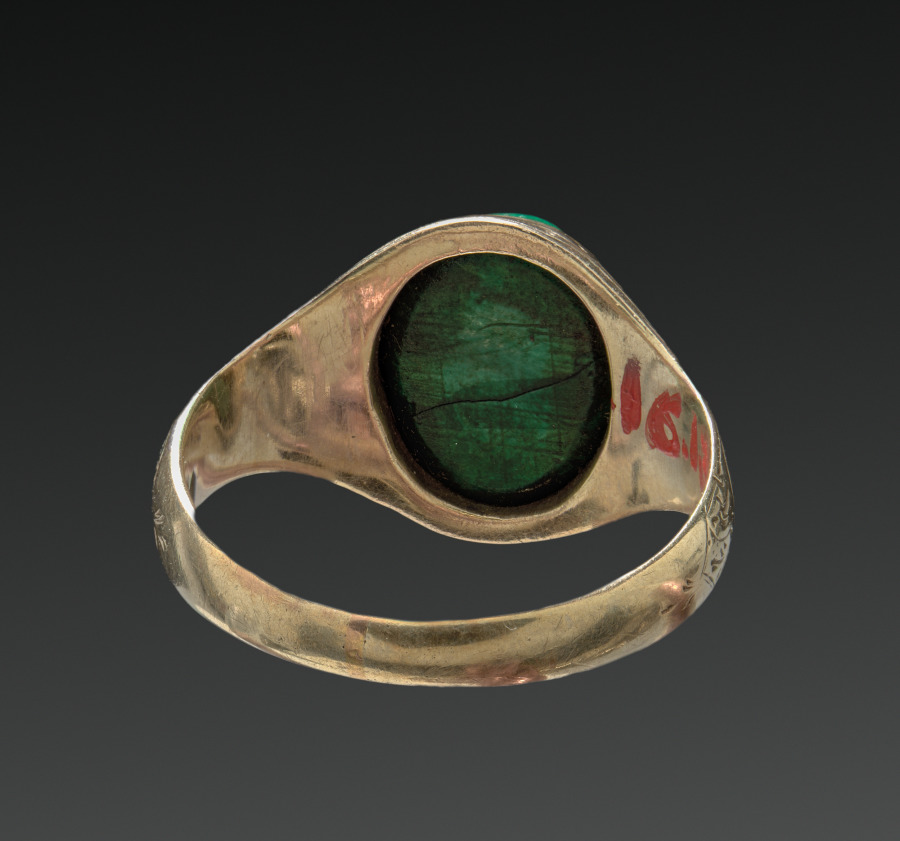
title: Ring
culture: America ?, 19th century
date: c. 1870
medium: gold band with green stone head set with diamond chips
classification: Jewelry